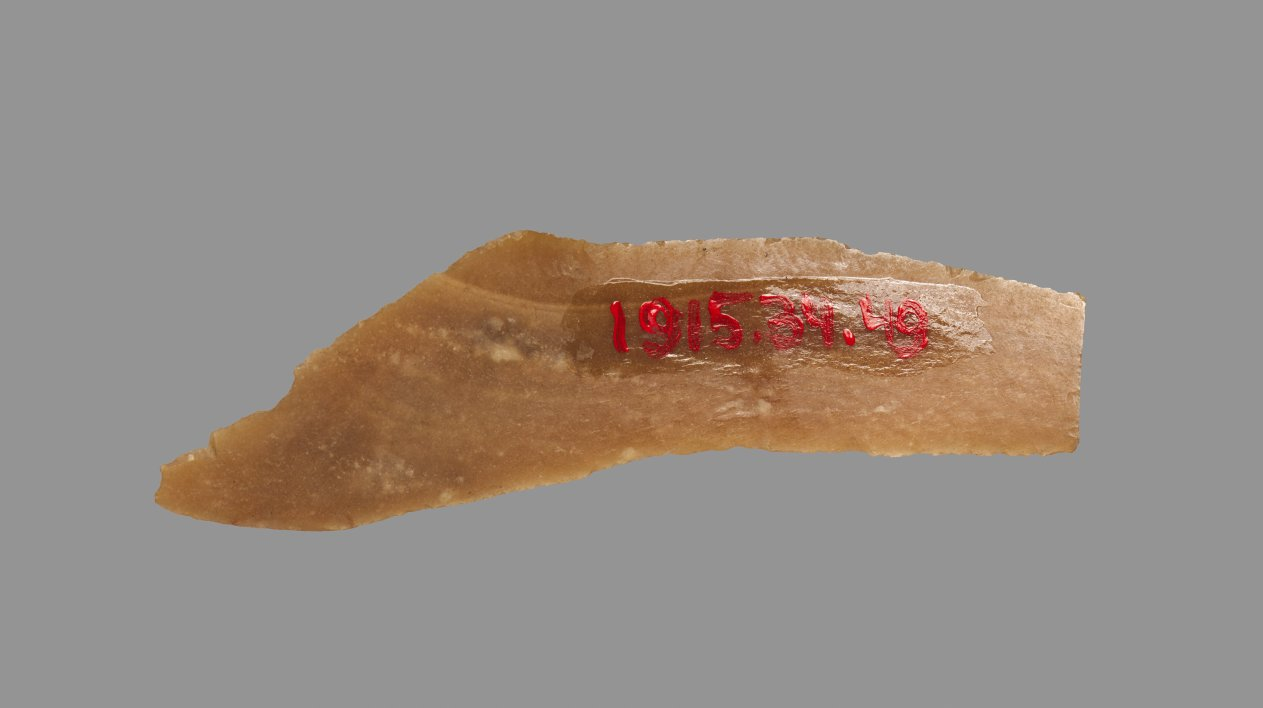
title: Sickle Blade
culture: Egypt, Middle Kingdom (2040–1648 BCE), Dynasty 12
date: 1980–1801 BCE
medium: flint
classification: Implements